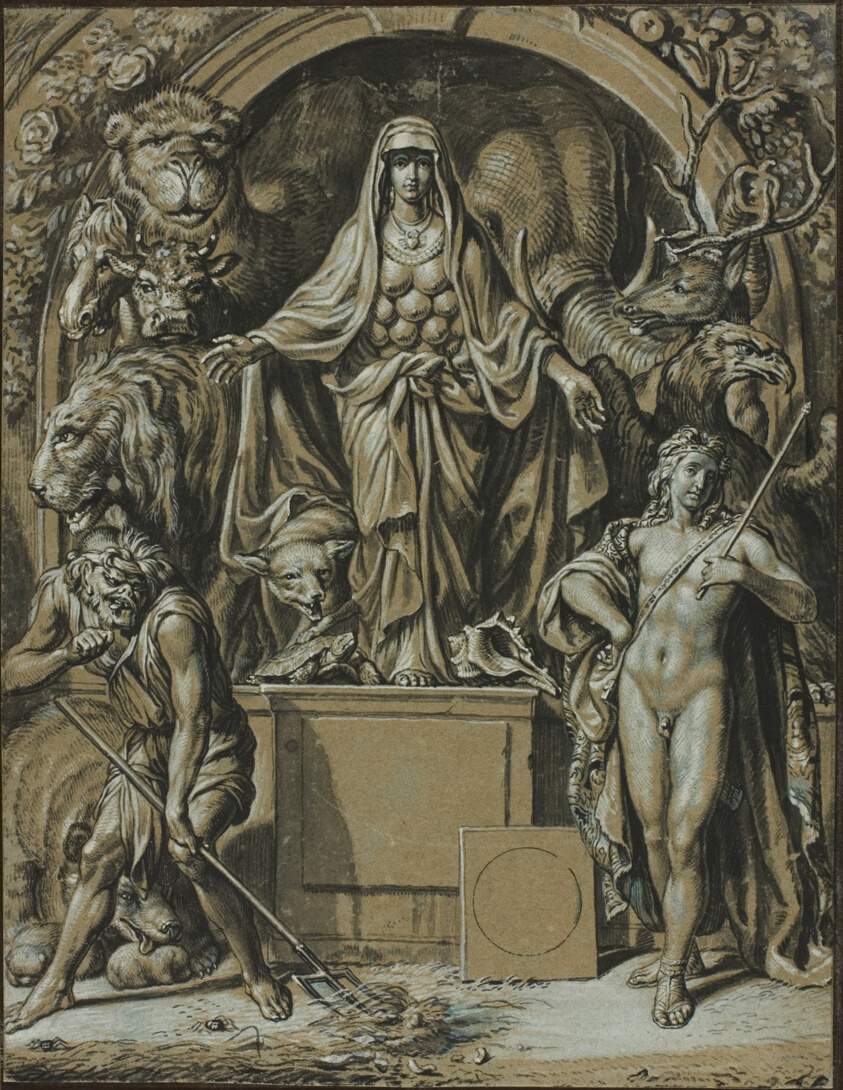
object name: Drawing and Watercolor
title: Diana of Ephesus as Allegory of Nature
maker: Joseph Werner (Swiss, 1637-1710)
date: c. 1680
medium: Pen and black ink and brush and gray wash, white and blue gouache, on blue laid paper (discolored to light brown), mounted to laid card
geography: Switzerland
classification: pen and ink drawings; drawings (visual works); prints and drawing